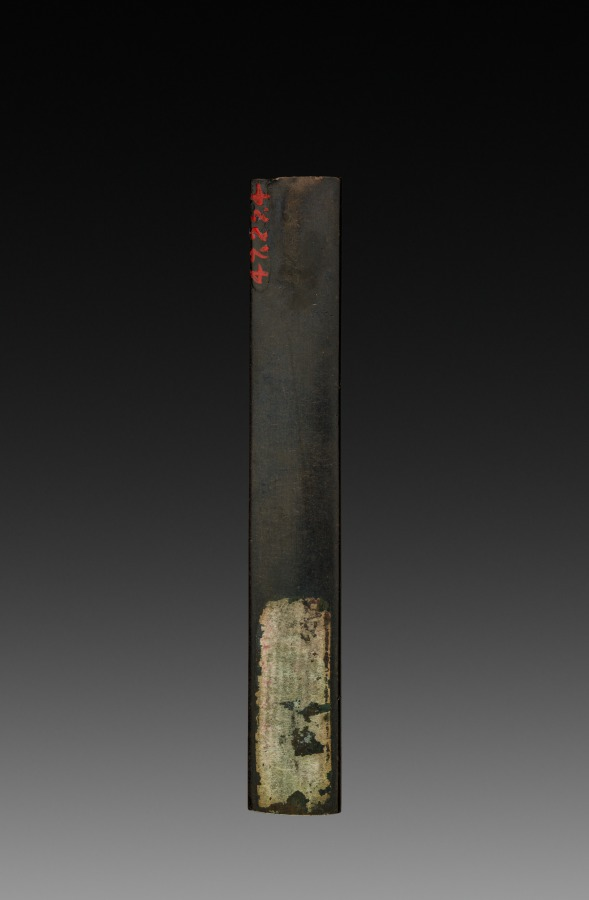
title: Knife Handle (Kozuka)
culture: Japan, Edo period (1615–1868)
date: early to mid-1800s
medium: inlaid bronze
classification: Metalwork